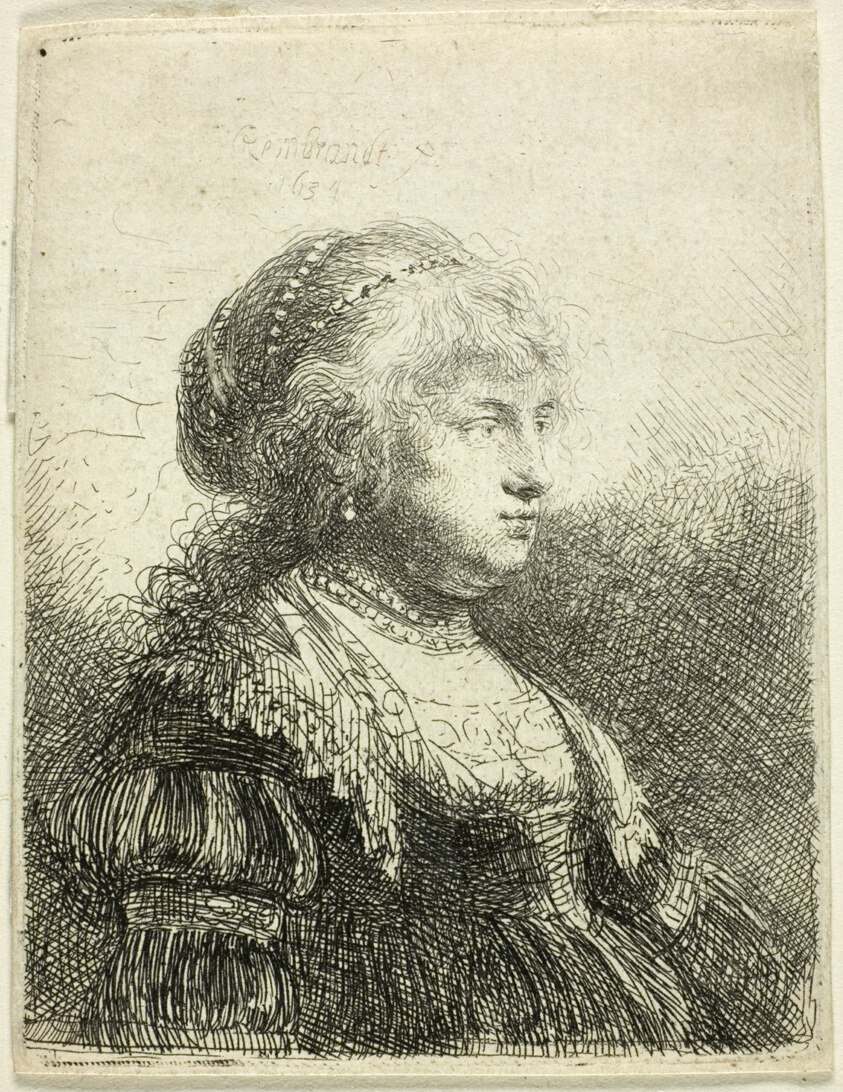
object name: Print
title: Saskia with Pearls in Her Hair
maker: Rembrandt van Rijn (Dutch, 1606-1669)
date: 1634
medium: Etching and drypoint on paper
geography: Holland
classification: etching; print; prints and drawing; paper; drypoint